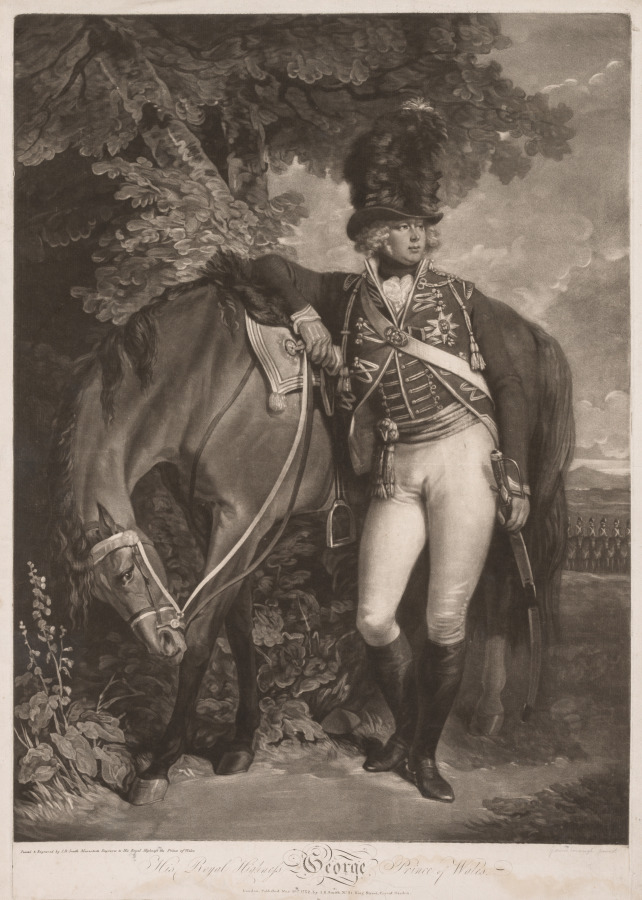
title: George, Prince of Wales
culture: England, 18th century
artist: John Raphael Smith (British, 1752–1812)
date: 1792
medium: mezzotint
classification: Print